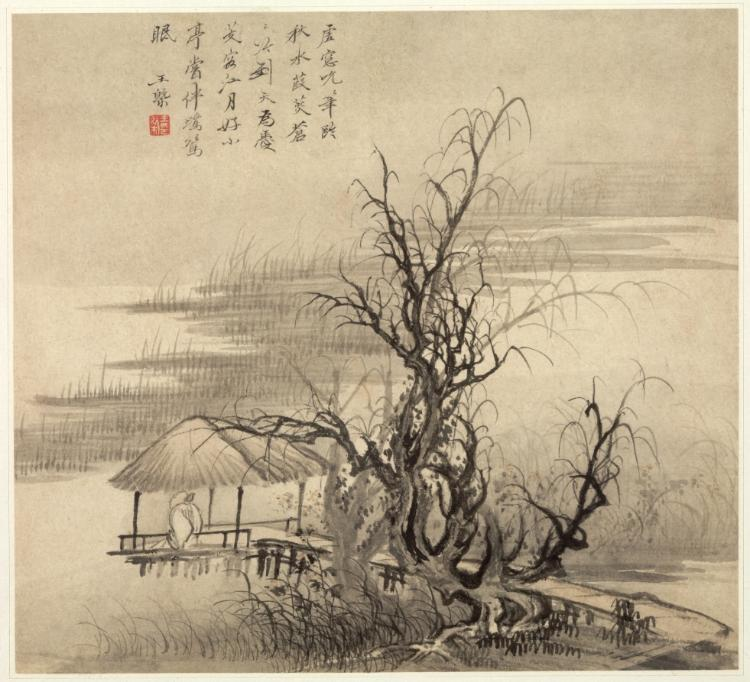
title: Album of Landscapes: Leaf 7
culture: China, Qing dynasty (1644-1911)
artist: Wang Gai (Chinese, active c. 1677–1705)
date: 1677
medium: album leaf, ink and light color on paper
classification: Painting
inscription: Artist's poem, signature and seal on leaf 7 Poem by Tai Wang-lun